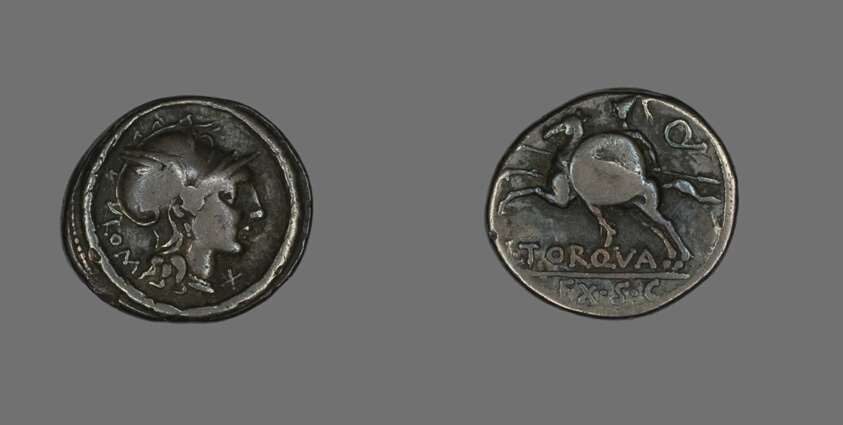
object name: Coin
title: Denarius (Coin) Depicting the Goddess Roma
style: roman (ancient, style or period), ancient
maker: Roman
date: 113-112 BCE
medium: Silver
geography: Roman Empire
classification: coin; ancient art